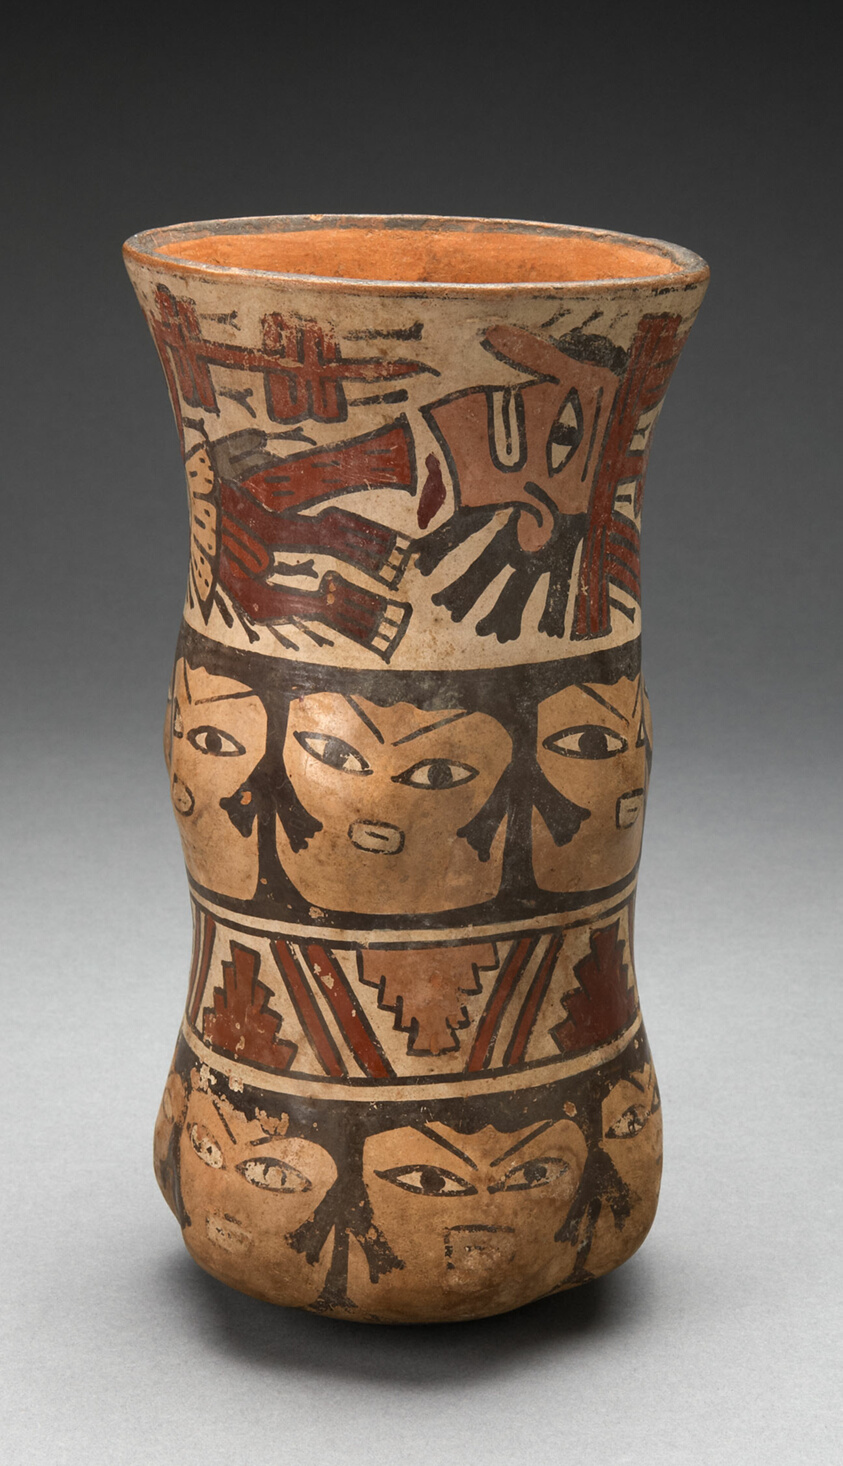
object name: Vessel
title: Curving Beaker with Rows of Abstract Human Faces and Sacrifice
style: nazca, early intermediate period, Pre-Columbian, americas, Arts of the Americas, andean, andes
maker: Nazca; South coast, Peru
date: 180 BCE–500 CE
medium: Ceramic and pigment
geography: Nazca Valley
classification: earthenware; art of the americas; ceramics; vessel